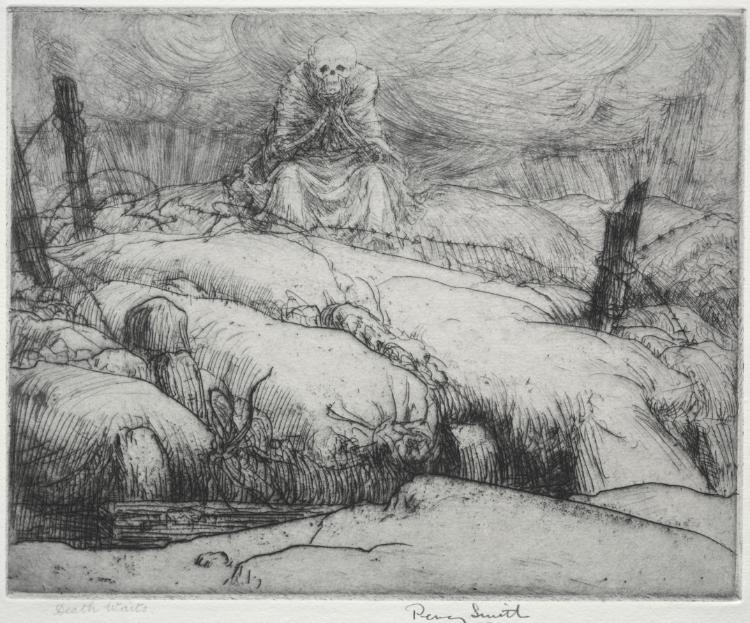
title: Dance of Death: Death Waits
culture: England, 20th century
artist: Percy John Delf Smith (British, 1882–1948)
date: 1919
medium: etching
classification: Print